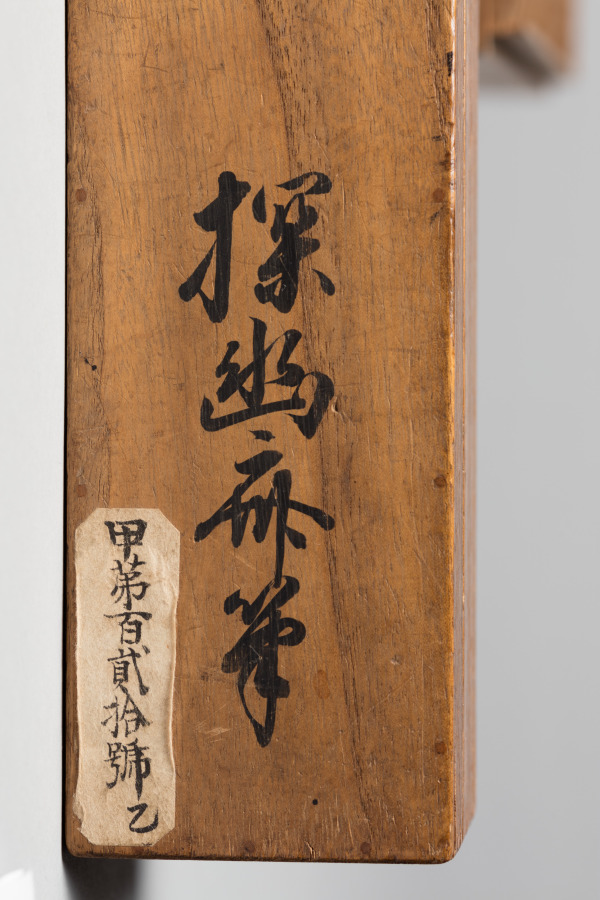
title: Gibbons Reaching for the Moon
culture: Japan, Edo period (1615–1868)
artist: Kano Tan’yū (Japanese, 1602–1674)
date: 1600s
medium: Hanging scroll; ink and light color on silk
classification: Painting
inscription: signed: "Tan'yūsai hitsu"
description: Long-armed gibbons form a chain to reach down from a tree, hoping to touch what they believe is the moon. In fact, the orb remaining beyond their grasp is the full moon’s reflection in the still surface of a pond or lake. The image is a common metaphor for the deluded mind in Buddhist thought. Gibbons do not live in Japan but were known to Japanese painters of the premodern era through paintings brought from China.